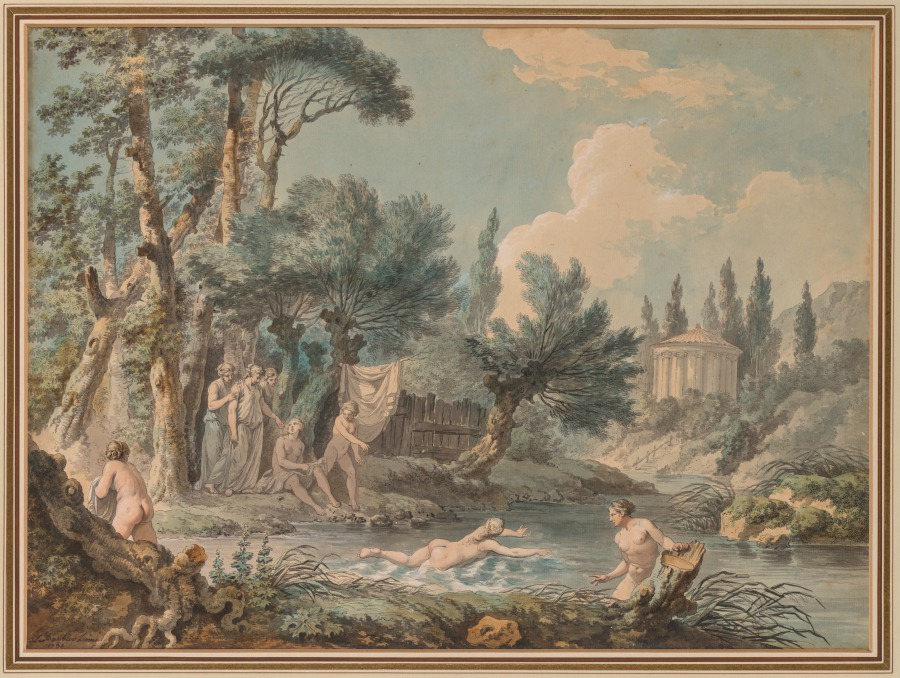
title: Nudes in a Landscape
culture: France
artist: Jean-Jacques-François Lebarbier, called Le Barbier L’Aîné (French, 1738–1826)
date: 1781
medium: Pen and black ink and watercolor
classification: Drawing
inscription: signed and dated, lower left corner, in black ink: Le Barbier L’ainé / 1781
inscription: verso: lower center, in graphite: E-14906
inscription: verso of mat: upper left corner, in graphite: E 14906 / Fit[?] 7" Frame / Rush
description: Le Barbier’s watercolor reflects the taste for Neoclassicism in late 18th-century France. In addition to the representation of nude figures, the artist’s admiration for antique art and architecture is also seen in the statuesque group of robed women standing in the central middle ground and the classicizing round temple on the right.